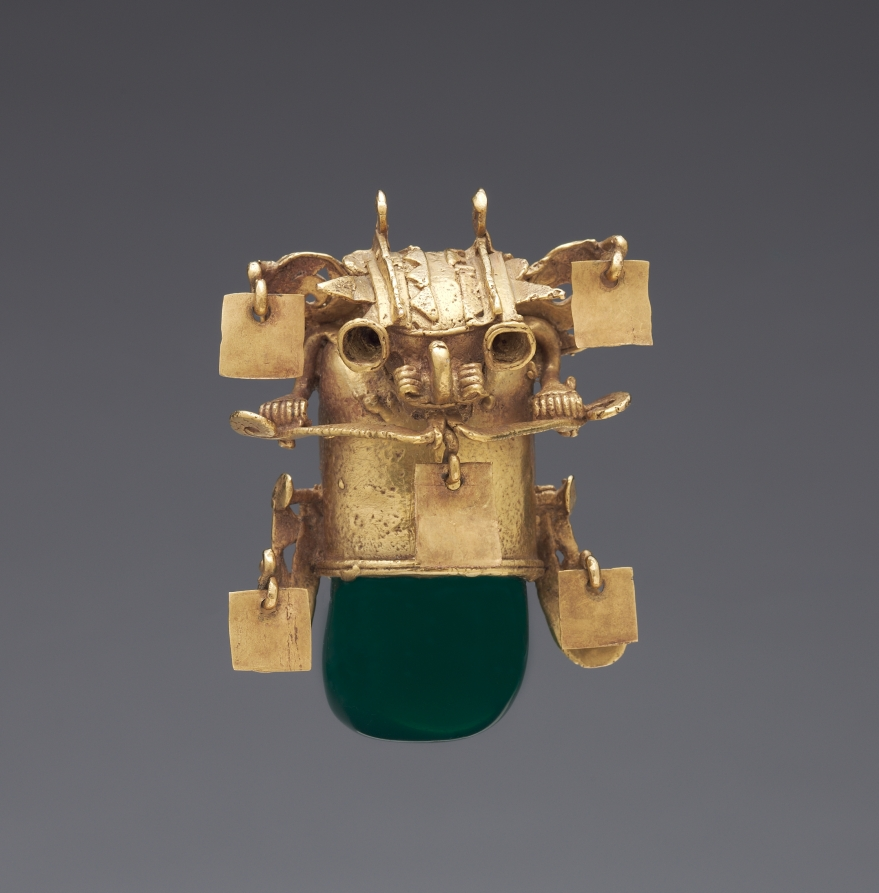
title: Crocodile Pendant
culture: Panama, Azuero Peninsula, Parita style, 11th-16th century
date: 1000–1550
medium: cast gold, modern greenstone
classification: Metalwork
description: Of great importance in ancient Panama were beings that combined crocodile features, especially the mouth, with lizard traits, such as the iguana’s head crest. This example also has a back-swept nose, perhaps that of the leaf-nosed bat. The greenstone is a modern replacement for a stone or shell that once completed the crocodile’s body.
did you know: The greenstone replaced a piece of carved whale bone that was once improperly paired with the pendant.